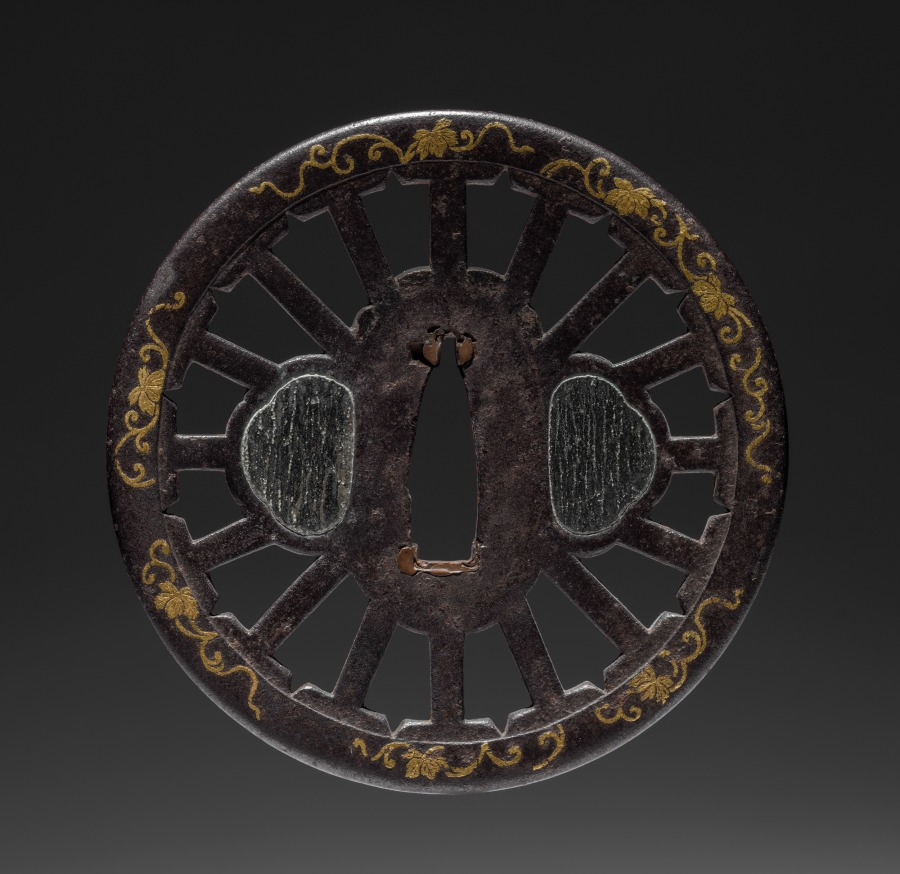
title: Sword Guard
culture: Japan, Edo period (1615–1868)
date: 1615–1868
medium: iron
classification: Arms and Armor